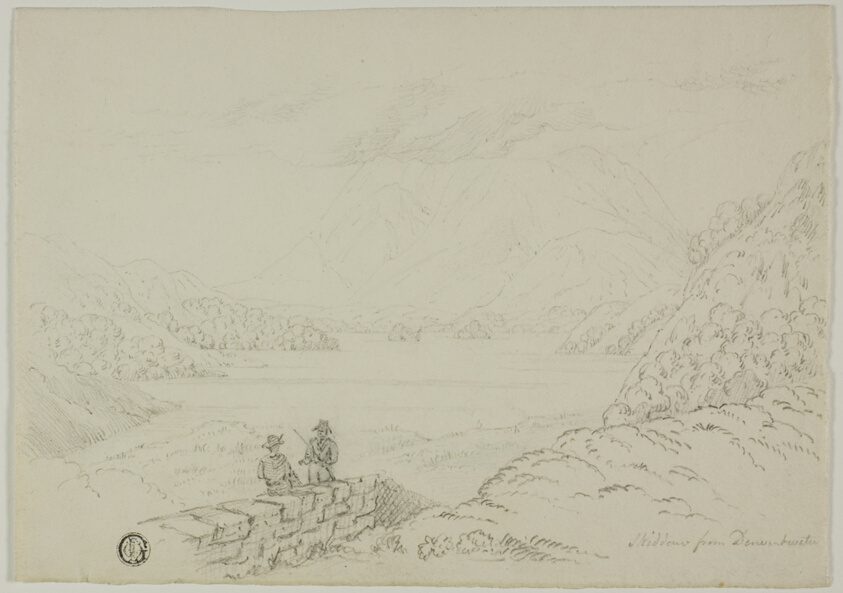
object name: Drawing and Watercolor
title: Skiddaw from Derwentwater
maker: Unknown Artist; British, n.d.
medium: Graphite on cream wove paper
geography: England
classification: graphite; drawings (visual works); prints and drawing